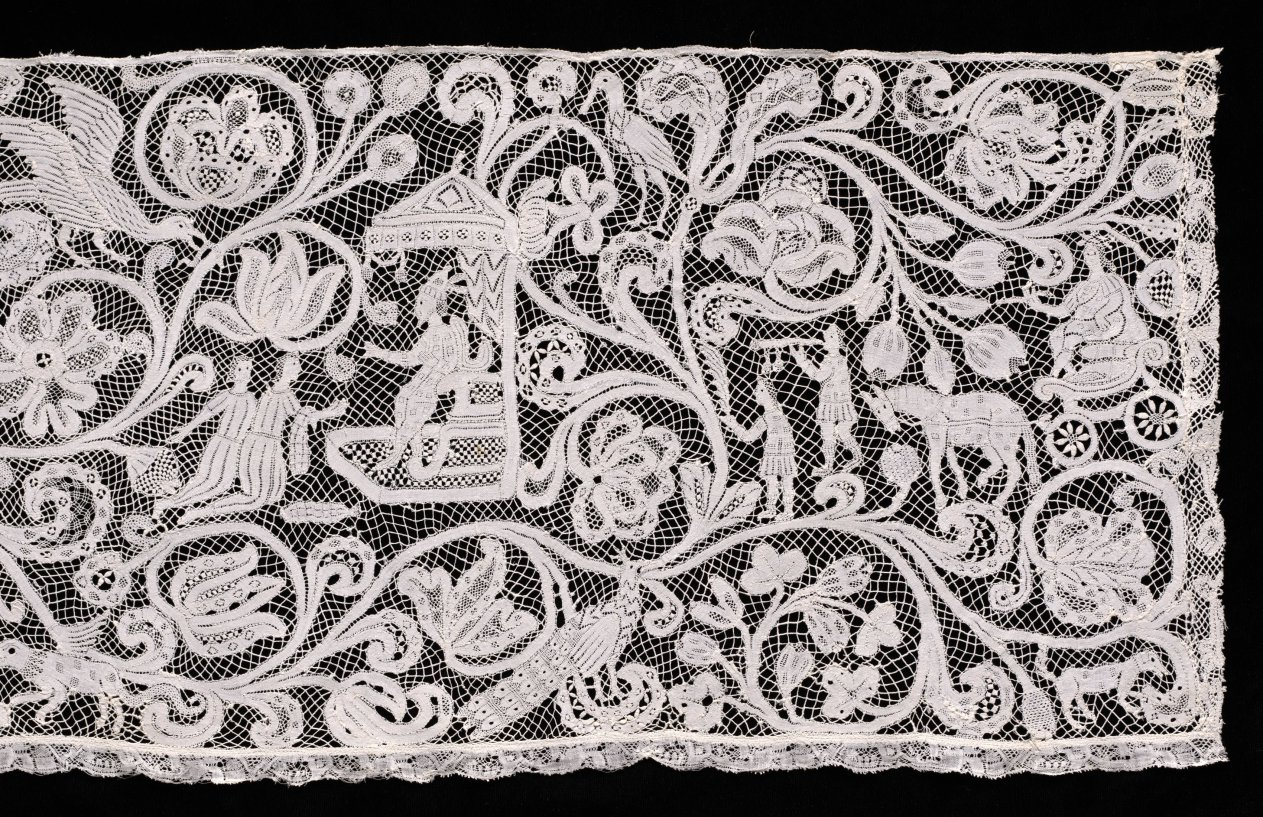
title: Lace Flounce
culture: Italy, Milan(?)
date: 1750–99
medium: Linen: bobbin lace (Punto di Milano)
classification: Lace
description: Being the most prestigious material, lace was used extensively by the 1600s for altar linen and for trimming priest’s albs, often incorporating finely rendered religious images amid blossoming vines. This alb flounce depicts scenes from the Old Testament story of Joseph, whose jealous brothers sold him to a caravan bound for Egypt. Joseph later interpreted dreams of the pharaoh, who made him ruler. When famine in Canaan caused Joseph’s ten brothers to travel to Egypt in search of food, they bowed down to him. After he revealed his identity, he forgave his brothers and God saved the family.